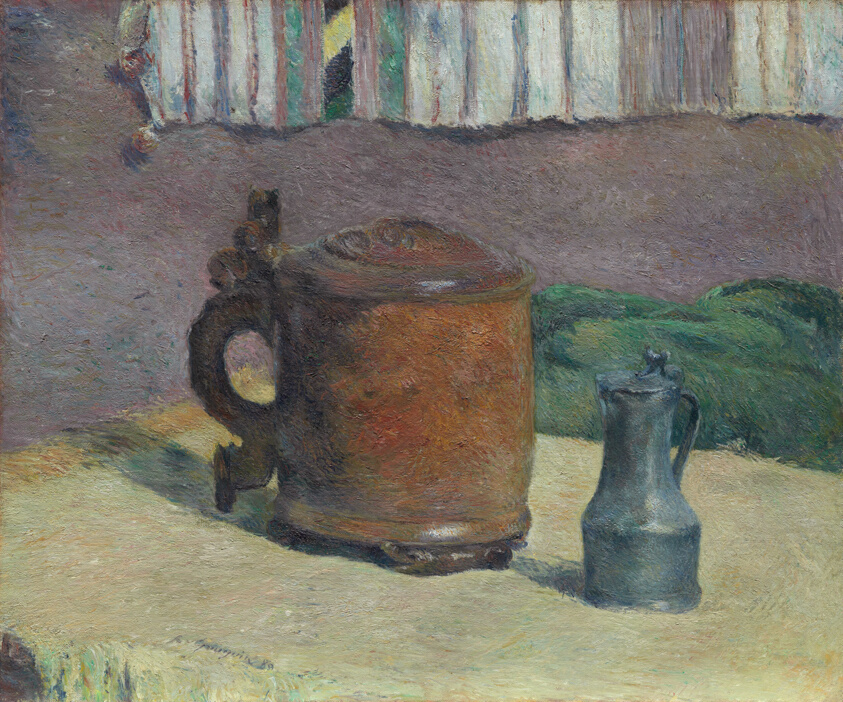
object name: Painting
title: Still Life: Wood Tankard and Metal Pitcher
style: Post-Impressionism, 19th century, nineteenth century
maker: Paul Gauguin (French, 1848–1903)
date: 1880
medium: Oil on linen canvas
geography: France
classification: oil on canvas; france; french; oil paintings (visual works); paint; still life; painting; european painting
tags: still life, France, French, cup, green (color), interior, metal, pitcher, purple (color), table, tankard, wood